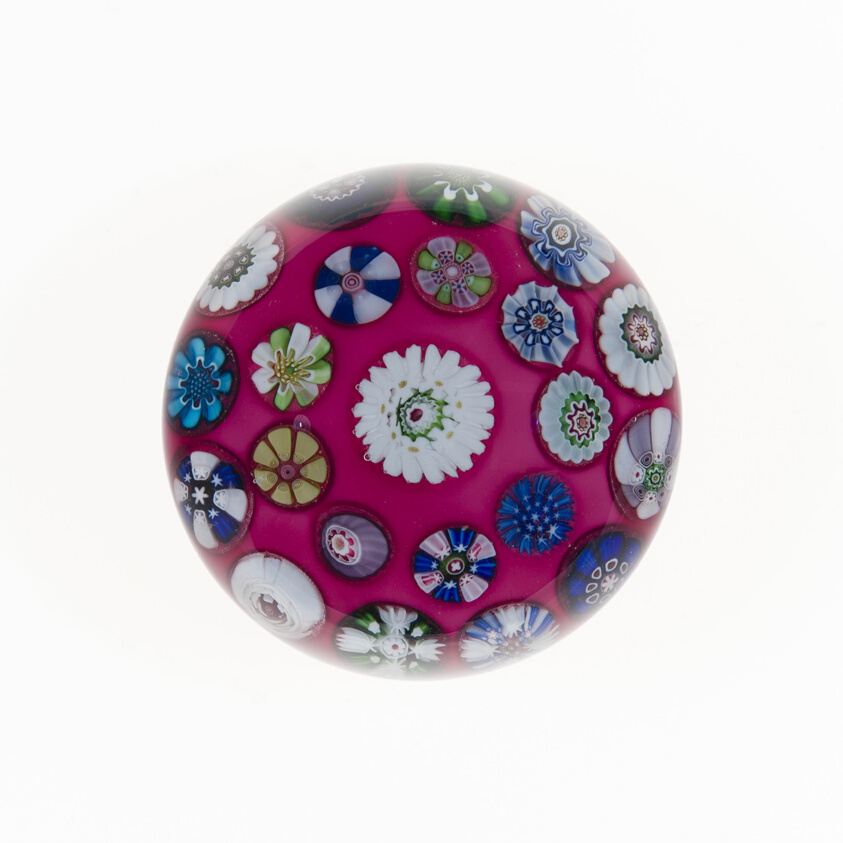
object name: Glass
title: Paperweight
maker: Clichy Glassworks (Cristalleries de Clichy); Clichy, France, 1837-1885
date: c. 1845/60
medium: Glass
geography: France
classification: paperweight; glass